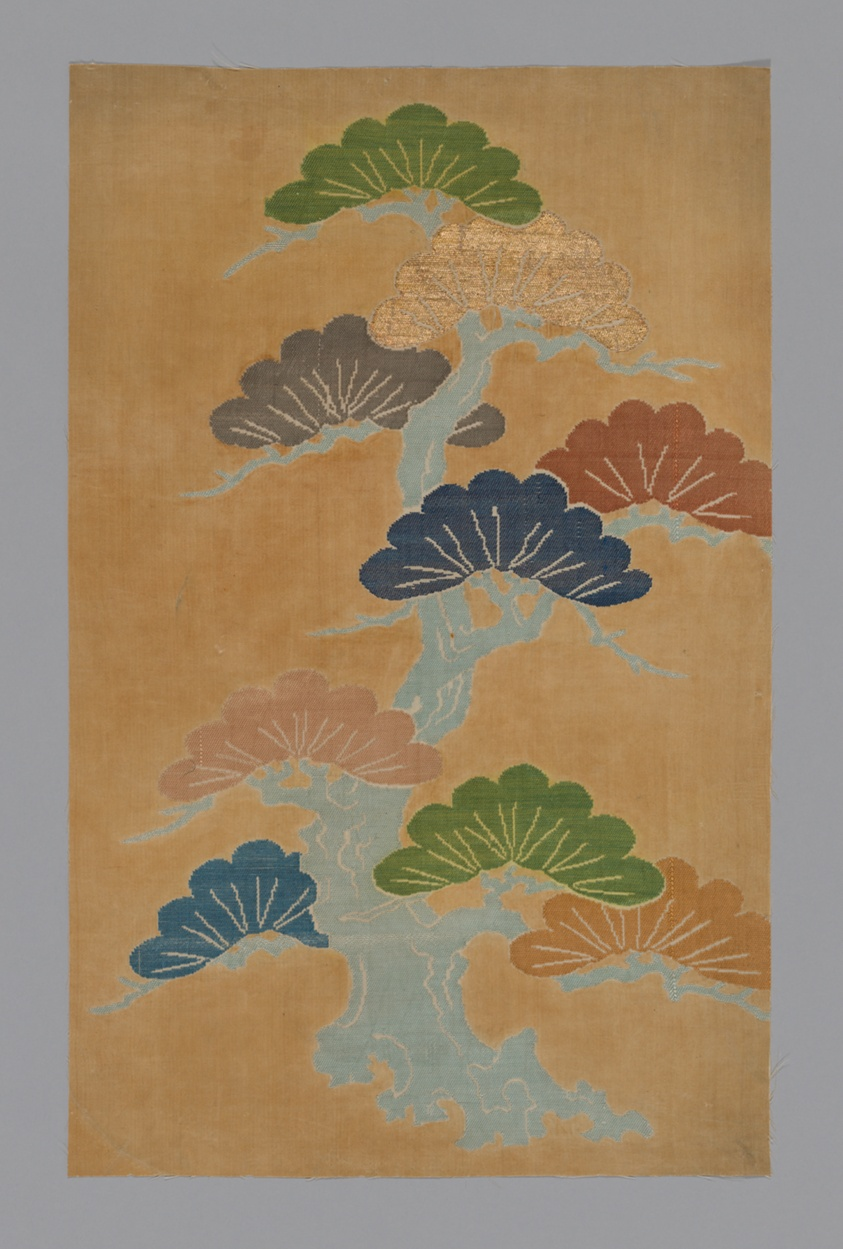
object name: Textile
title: Fragment (From a Noh Costume)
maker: Japan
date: Edo period (1615–1868), 17th century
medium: Brocaded plain simple twill, silk and gilt paper wound on white silk core.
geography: Japan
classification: textile; weaving